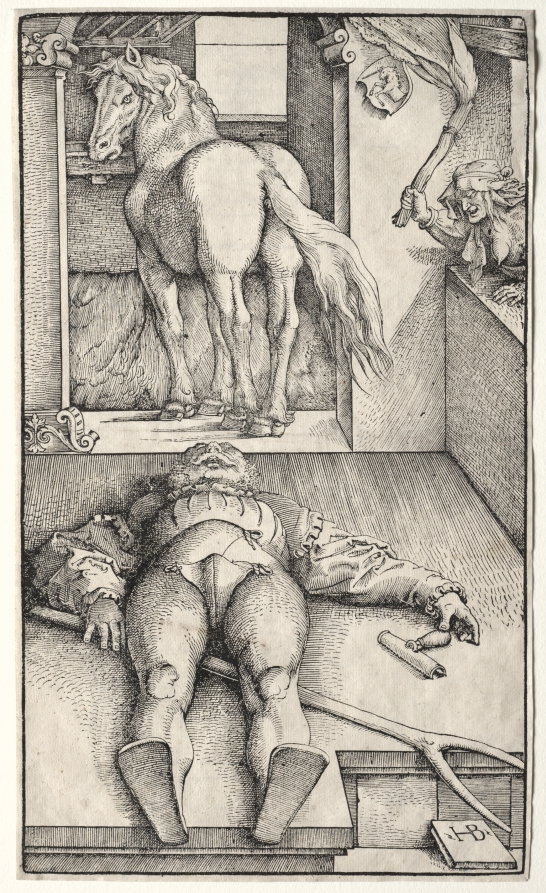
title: The Bewitched Groom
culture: Germany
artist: Hans Baldung (German, 1484/85–1545)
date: 1544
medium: woodcut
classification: Print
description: Envious witches were maligned as deceitful, sexualized women, hags who toppled righteous men in their lustful quests. Baldung's bizarre and unsettling image depicts a noble male figure lying unconscious in an open room, as a glaring mare (a symbol of unrestrained sexuality) and flailing witch peer in. The angular nose and chin and sagging, bare breasts of the malevolent hag echo the face and bony chest of Veneziano's emaciated personification of Death.